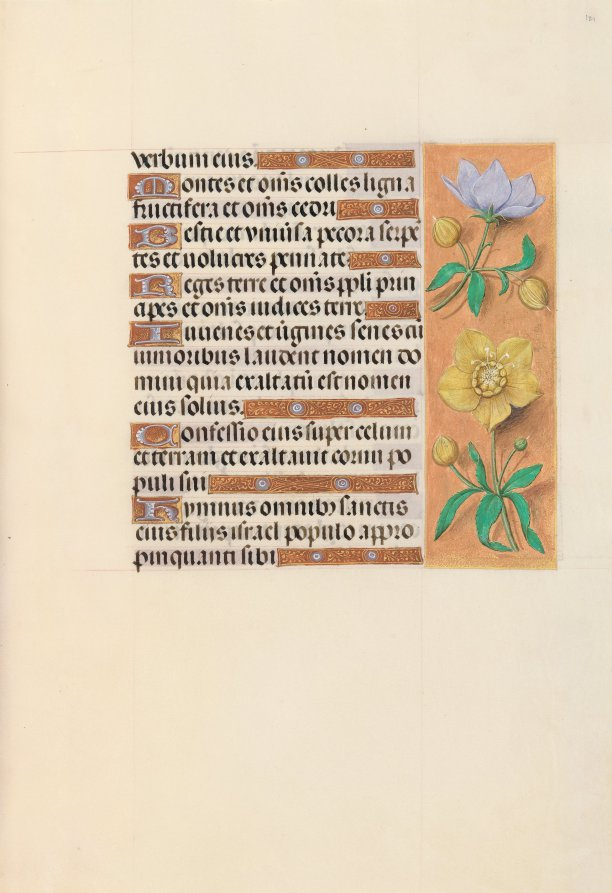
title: Hours of Queen Isabella the Catholic, Queen of Spain: Fol. 121r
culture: Flanders, Ghent and Bruges, late 15th century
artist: Master of the First Prayerbook of Maximillian (Flemish, c. 1444–1519)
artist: and Associates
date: c. 1500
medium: ink, tempera, and gold on vellum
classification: Bound Volume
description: This manuscript was illuminated by a circle of at least five highly organized manuscript painters active in the Flemish cities of Ghent and Bruges. The principal illuminator was Alexander Bening, who painted the majority of the book's miniatures. Manuscripts produced by this circle of artists are renowned for the decoration of their borders, which typically feature a rich variety of realistically-painted flowers, birds, and butterflies. This prayer book, called a book of hours, was intended not for a cleric, but for the private devotions of a lay person-in this case, Isabella the Catholic, Queen of Spain (1451-1504). Isabella's coat of arms embellishes the book's frontispiece. It is unlikely that the book was commissioned by the Queen herself; rather, she probably received it as a diplomatic gift from someone courting her patronage, perhaps Cardinal Francisco Jimenez de Cisneros. A Franciscan friar, Jimenez was dependent upon Isabella for his advancement, first to the post of Queen's confessor in 1492, and then to Archbishop of Toledo in 1495.